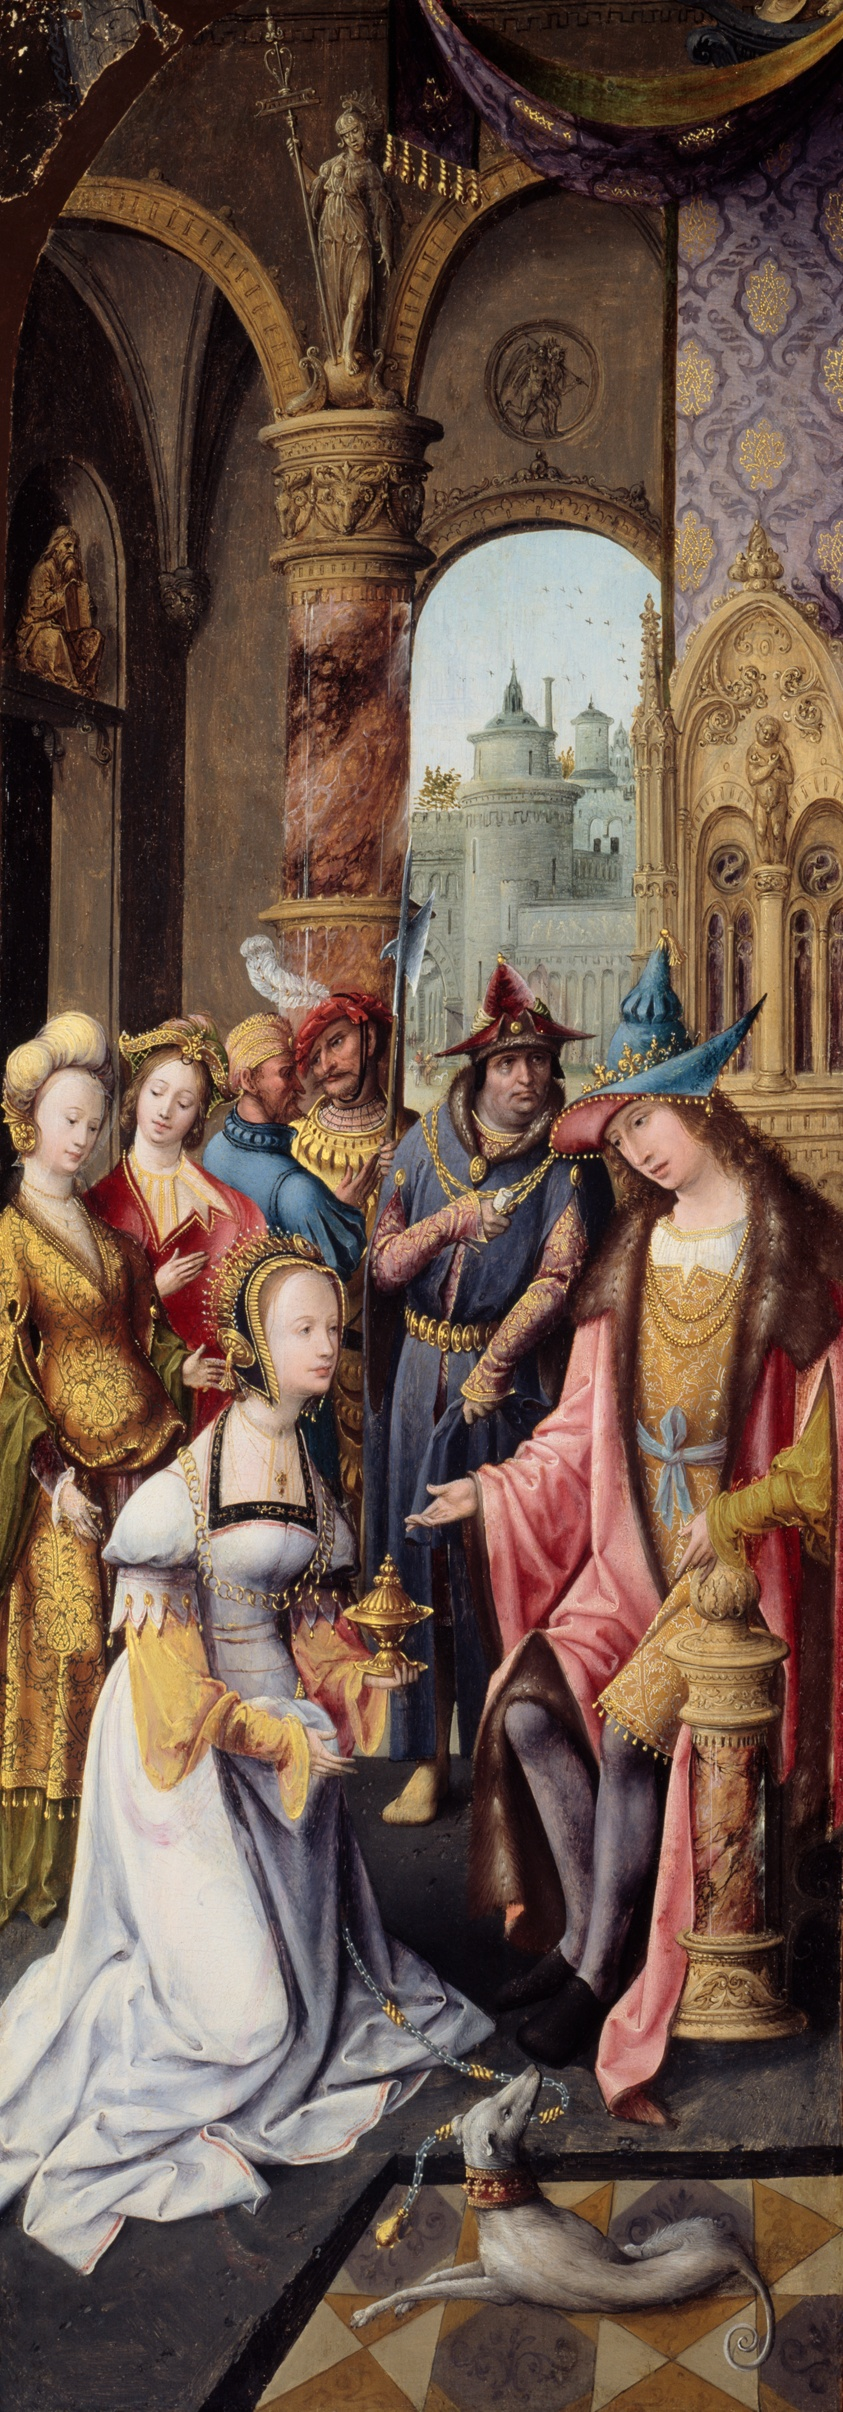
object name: Painting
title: King Solomon Receiving the Queen of Sheba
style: 16th Century, Renaissance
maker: Master of the Antwerp Adoration Group (Netherlandish, active c. 1520)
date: 1515–20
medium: Oil on panel transferred to canvas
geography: Belgium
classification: oil on canvas; oil; oil on panel; painting; european painting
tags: religious, Christian subjects, Christianity, king, kings, queens, religion, religious figures, religious scenes